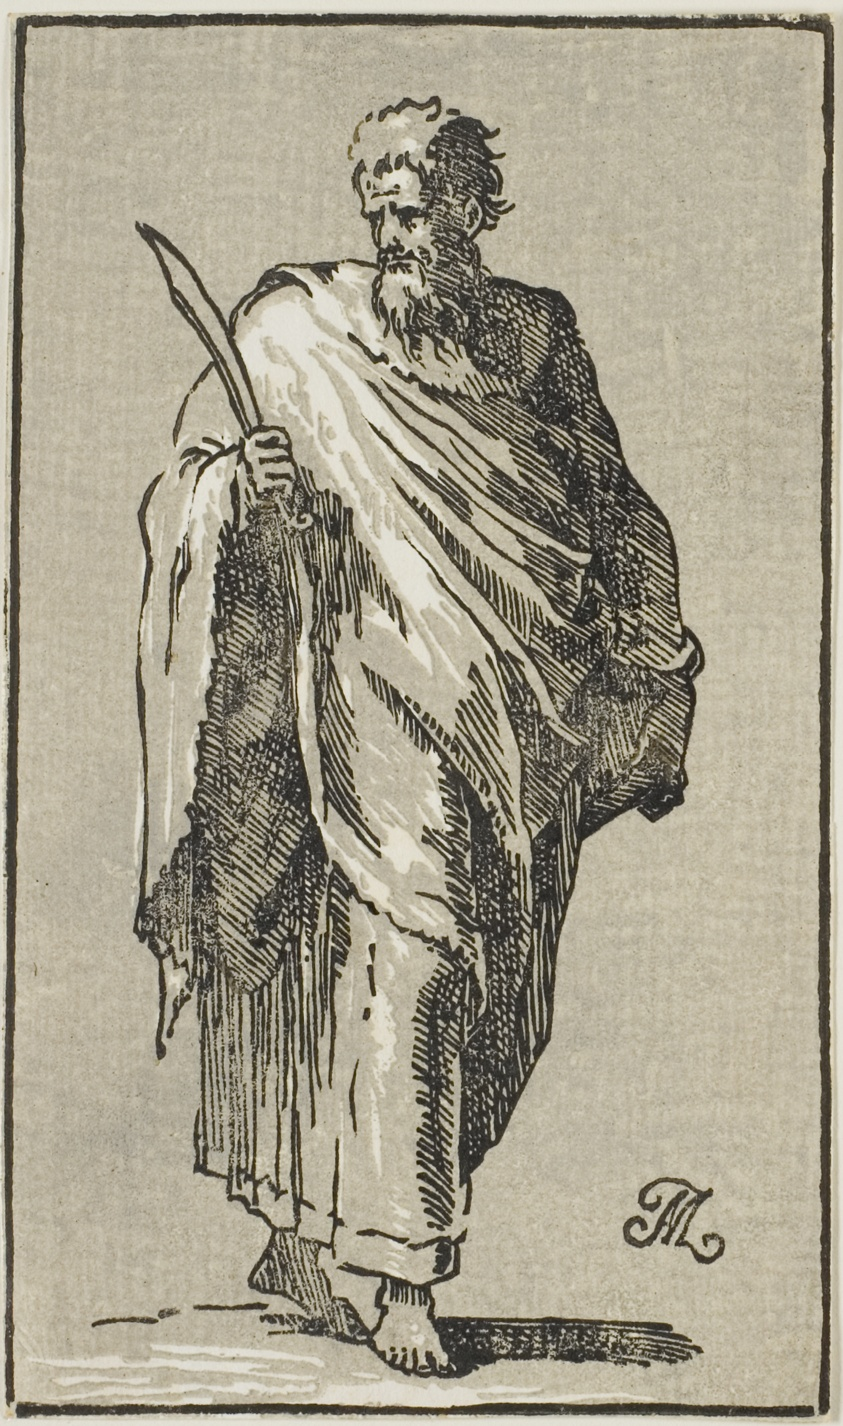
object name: Print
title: St. Bartholomew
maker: Conte Anton Maria Zanetti; Italian, 1680–1767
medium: Chiaroscuro woodcut in gray and black on ivory laid paper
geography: Italy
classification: woodcut; print; prints and drawing